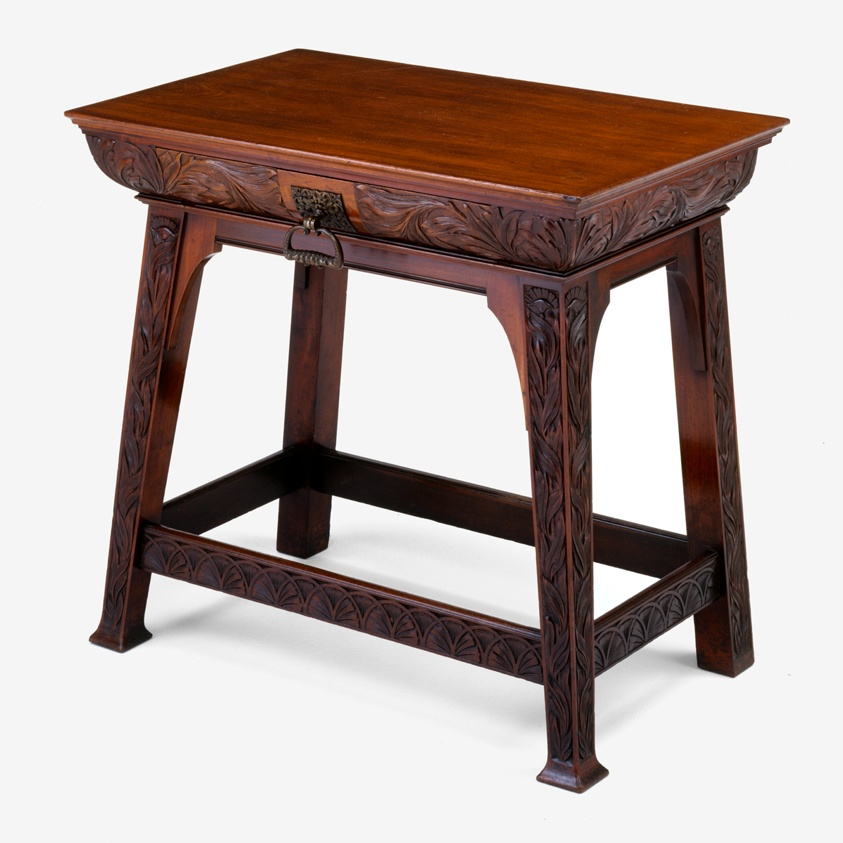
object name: Furniture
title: Side Table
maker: Arthur Heygate Mackmurdo (English, 1851-1942); England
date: c. 1890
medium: Mahogany and gilt brass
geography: England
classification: table; furniture; european decorative arts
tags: furniture